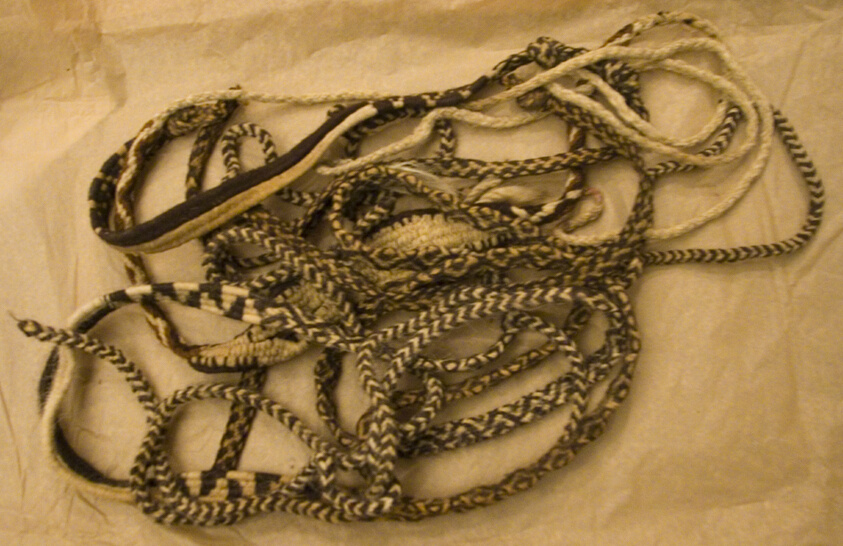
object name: Textile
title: Slings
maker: Peru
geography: Peru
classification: textile; weaving